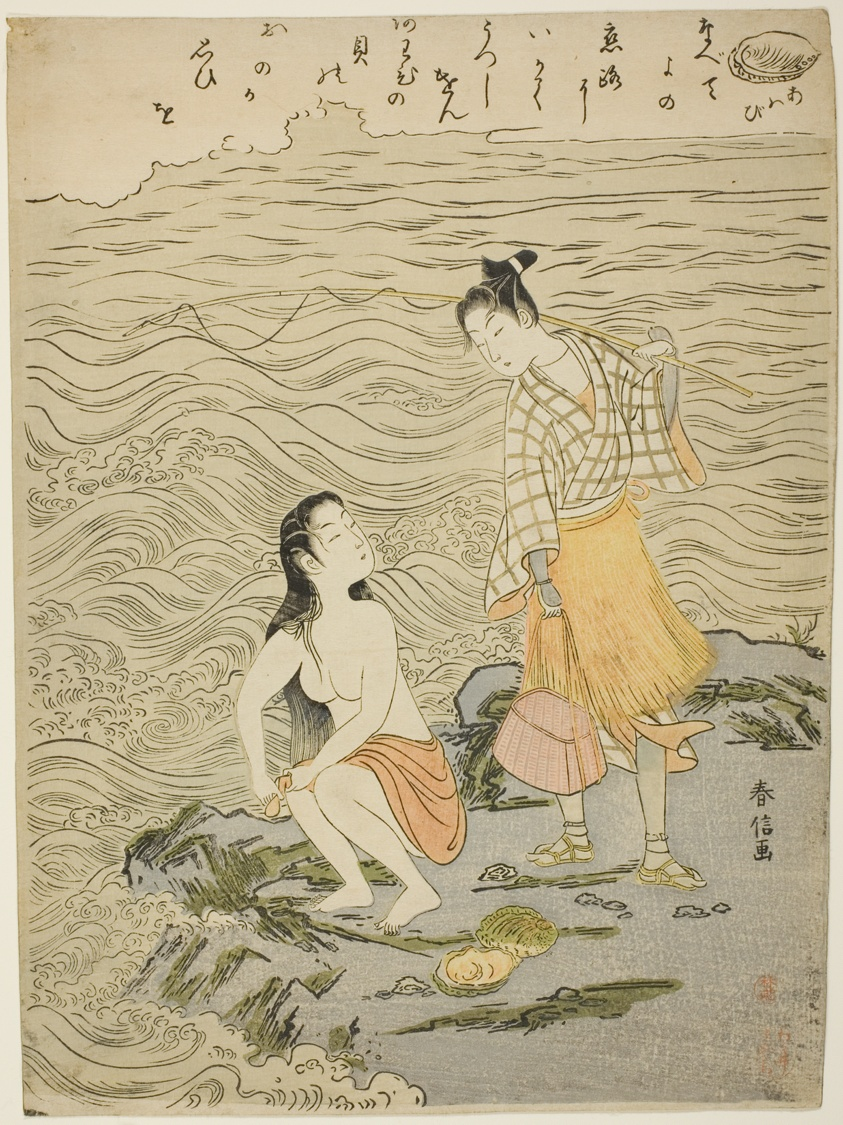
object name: Print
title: The Abalone (Awabi), from an untitled series of Shells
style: Japanese (culture or style)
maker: Suzuki Harunobu 鈴木 春信; Japanese, 1725 (?)-1770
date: c. 1769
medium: Color woodblock print; chuban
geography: Japan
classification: woodblock print; print; asian art